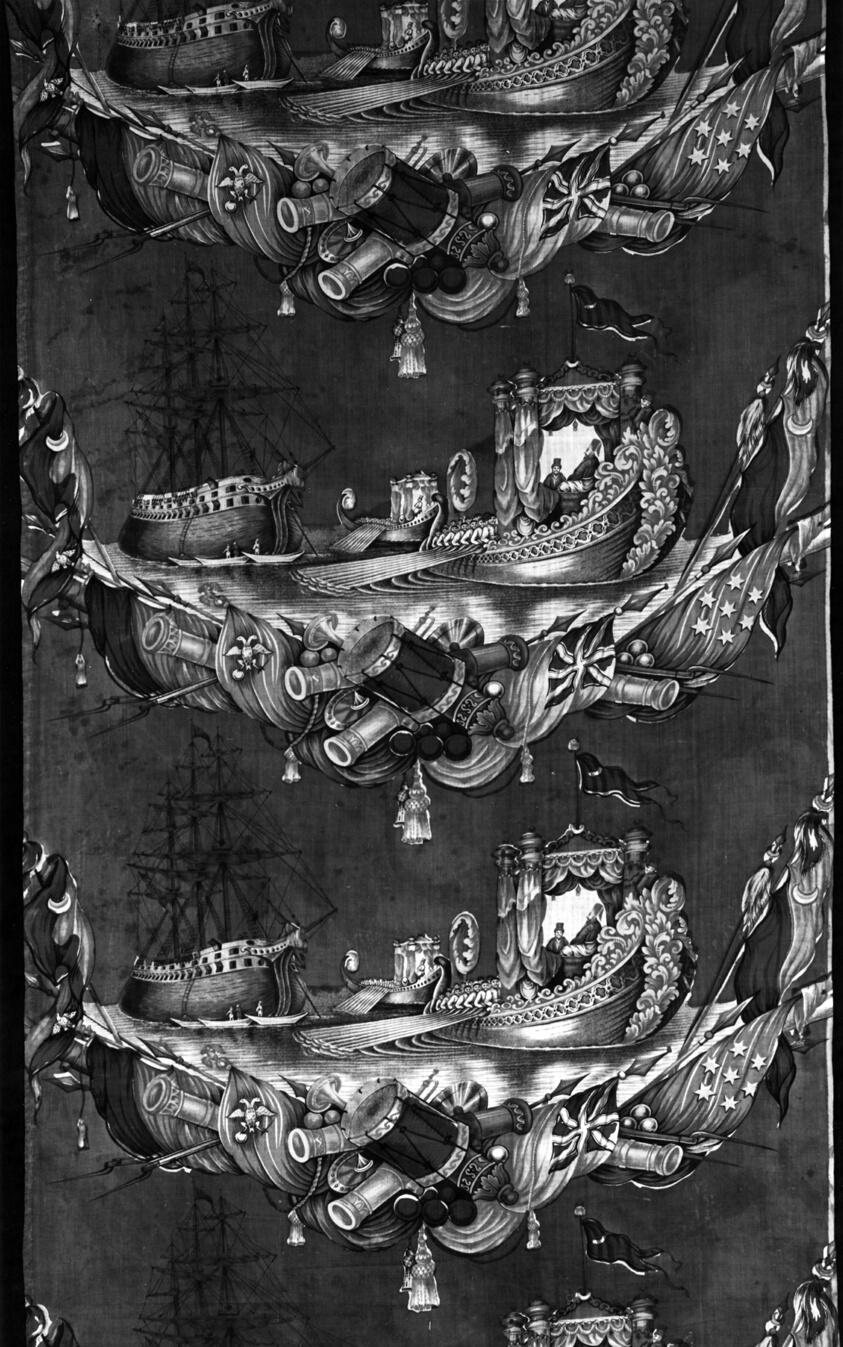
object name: Textile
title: The Battle of Navarino (Furnishing Fabric)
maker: England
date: c. 1827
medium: Cotton, plain weave; engraved roller printed; possibly some block printed; glazed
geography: England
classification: textile; weaving - printed; furnishing textile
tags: propaganda